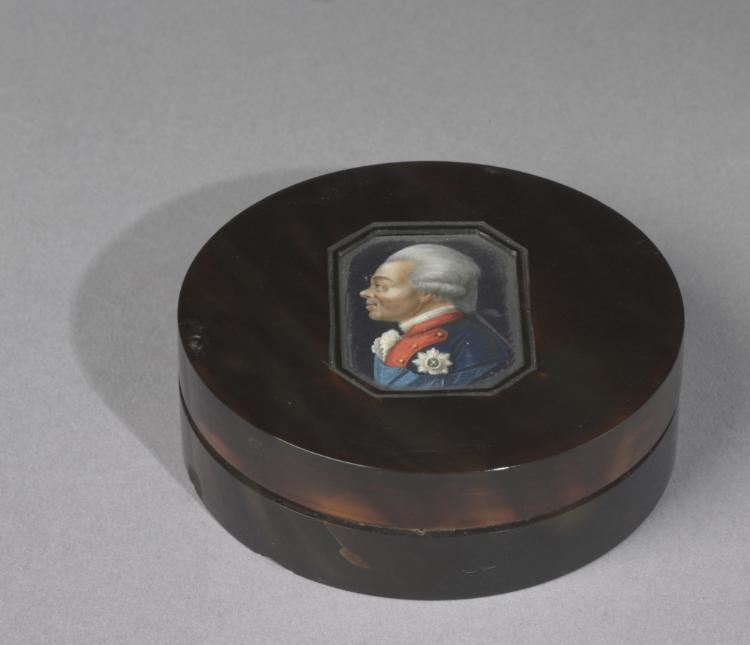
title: Snuff Box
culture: Continental, early 19th century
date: c. 1800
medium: tortoiseshell box with painted portrait miniature under glass, inset on cover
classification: Miscellaneous